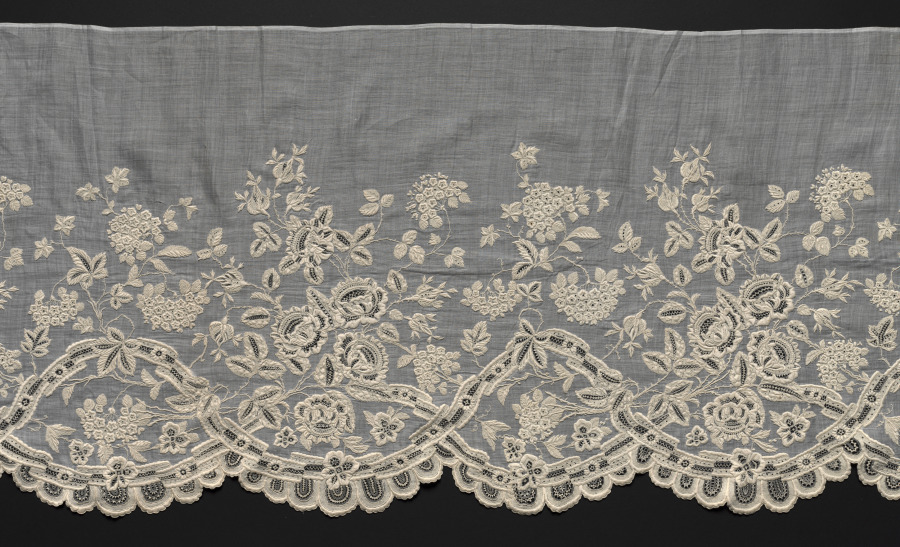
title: Flounce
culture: France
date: 1800–1820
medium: Plain weave cotton: embroidered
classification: Embroidery